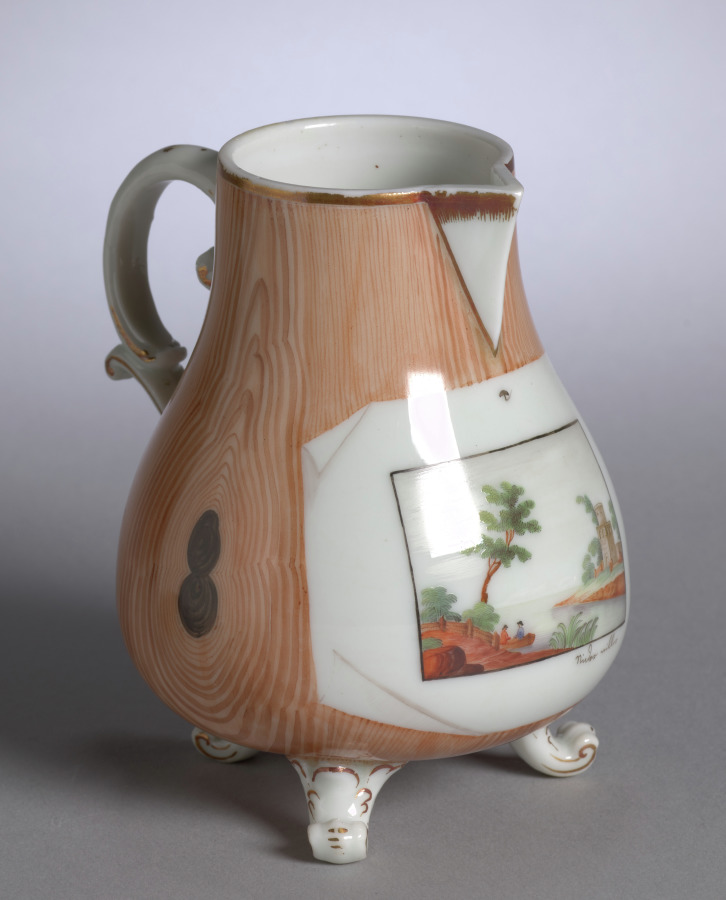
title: Covered Jug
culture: France, 18th century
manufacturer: Niderviller Factory (French)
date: c. 1780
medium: porcelain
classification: Ceramic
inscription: inscribed at lower right corner of trompe l'oeil print: Niderviller.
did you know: Cream jugs with lids or covers usually held warm cream for coffee or tea.